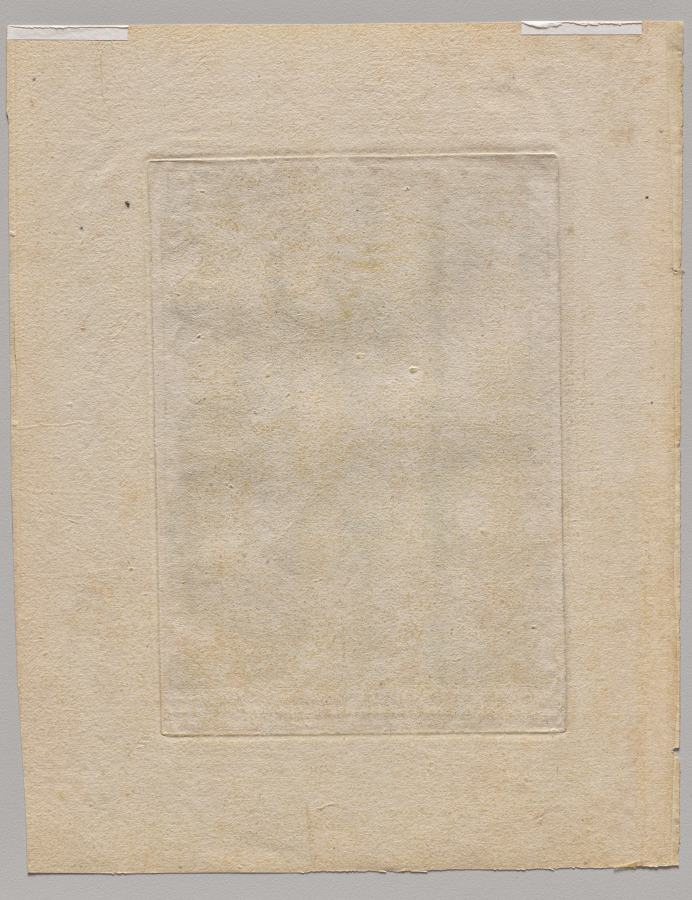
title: Plate 3: Simeon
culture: Netherlands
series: The Twelve Sons of Jacob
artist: Jacob de Gheyn II (Netherlandish, 1565–1629)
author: after Karel I van Mander (Netherlandish, 1548–1606)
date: c. 1589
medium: engraving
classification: Print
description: In this print, the biblical figure Simeon is posed with a sword and wearing armor, denoting the violent acts he perpetrated in his life. This is one of a series of prints depicting the twelve sons of Jacob, each with an attribute and costume that denotes his character. According to the Old Testament, Jacob blessed each of his twelve sons, prophesizing the destiny of their tribe, and assigning them a parcel of land in Canaan. The print series was made in the Netherlands in the late 16th century, a time of political struggle when Old Testament heroes were popular exemplars of fortitude and patience.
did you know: The bellicose nature of this figure is emphasized by his flying cloak and muscular frame, which turns away from the viewer and toward the possible subject of his ire.